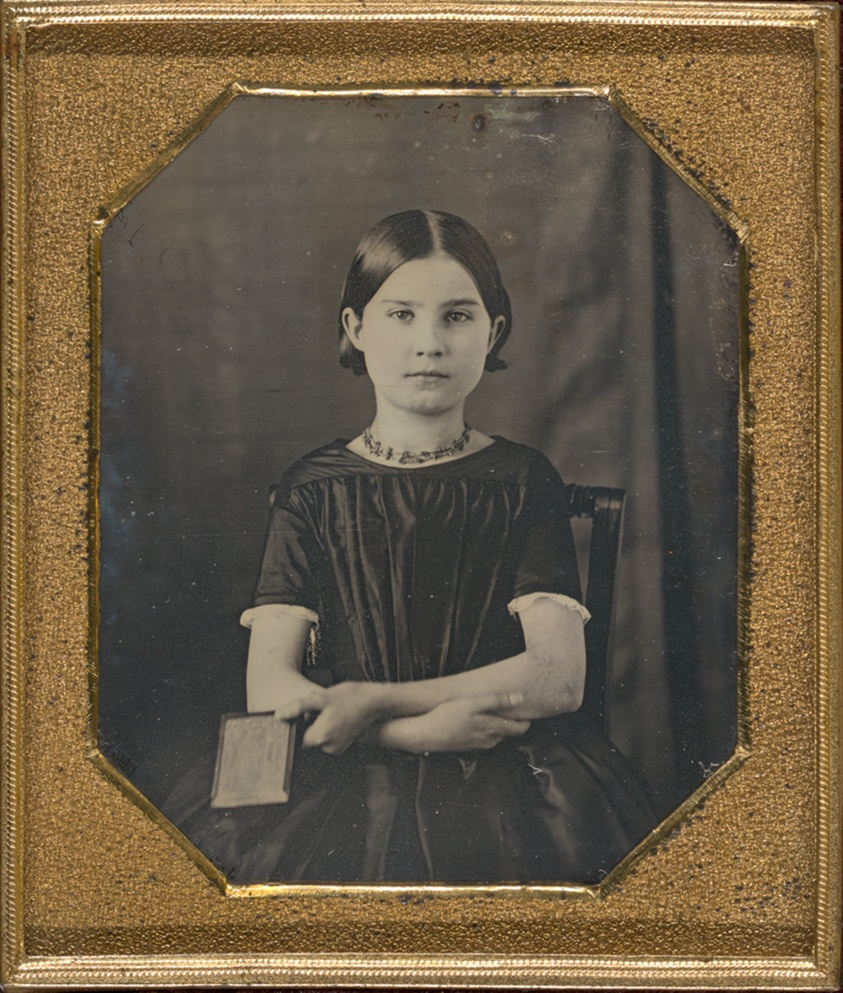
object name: Photograph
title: Untitled (Young Girl Holding Photograph)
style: 19th century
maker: Artist unknown; 19th century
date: 1839/99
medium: Daguerreotype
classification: photography; photograph